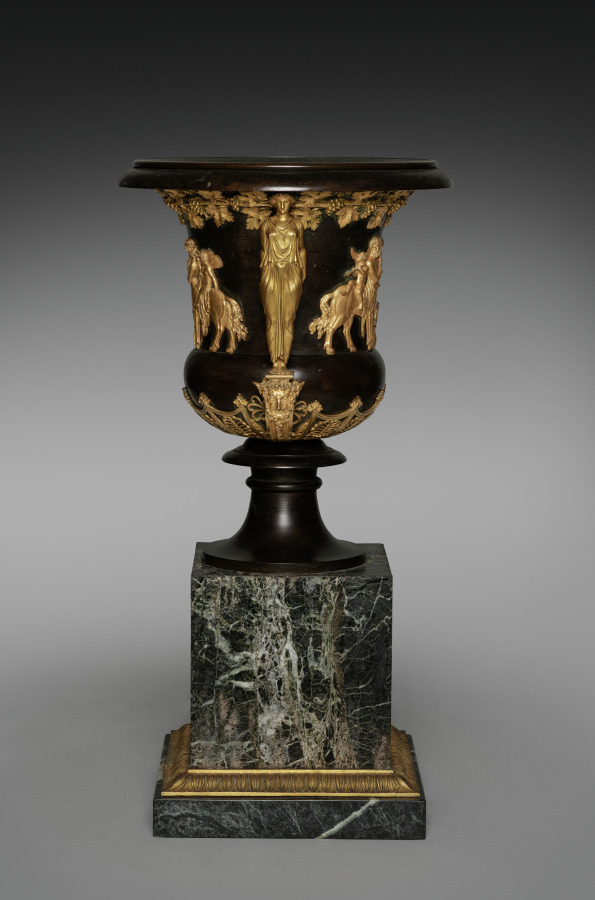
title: Vase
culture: France, late 18th-early 19th Century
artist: attributed to Pierre Philippe Thomire (French, 1751–1843)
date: c. 1800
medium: bronze, partially gilt, marble base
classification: Metalwork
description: In 1798, a large quantity of French furnishings was acquired for the Michael Palace in St. Petersburg, Russia. Some of these pieces survive in museums like the Hermitage Museum in St. Petersburg. This institution recently staged an exhibition of such French pieces by and attributed to Thomire. Among the objects shown was a bronze vase virtually identical in design to this piece. The body of this vase is decorated with two small reliefs showing male and female centaurs with putti riding on their backs. These reliefs also occur on silver wine coolers produced by the Odiot firm, a major Parisian silversmith under Napoleon's empire. The Odiot firm still owns models of these reliefs that, according to tradition, had been given to Jean-Baptiste Claude Odiot by Thomire.